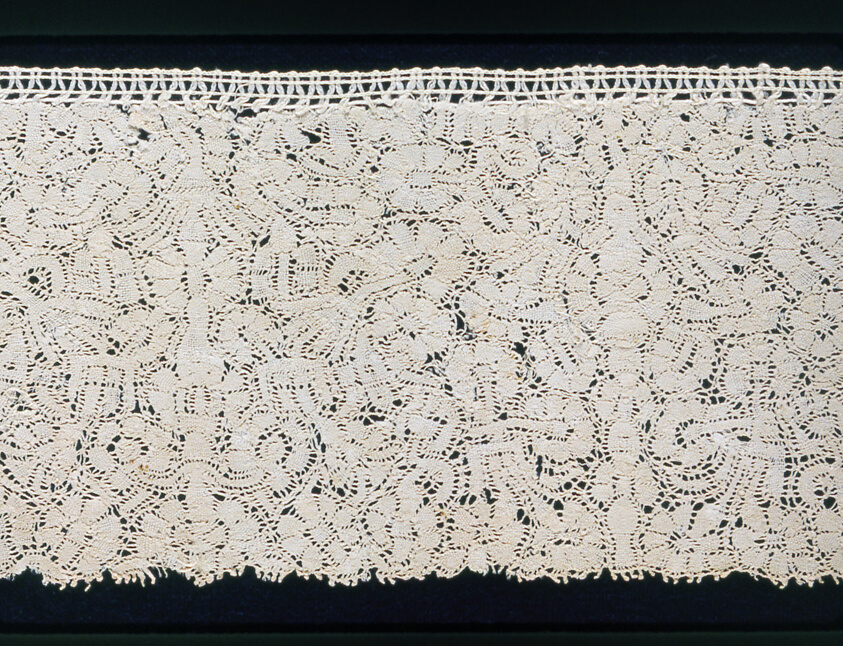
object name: Textile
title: Border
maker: Belgium, Flanders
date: 1625/75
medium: Linen, bobbin part lace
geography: Flanders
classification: textile; lace - bobbin